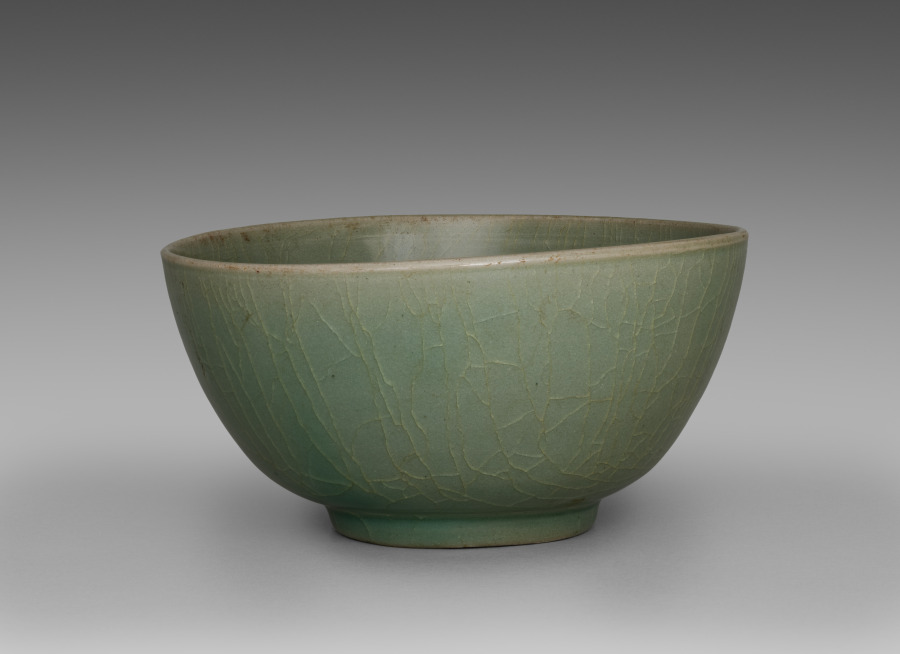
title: Celadon Bowl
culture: Korea, Goryeo dynasty (918–1392)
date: 1200s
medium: Celadon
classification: Ceramic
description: As early as the seventh century, the practice of drinking tea and wine became an important part of elite leisure culture in Korea. A wide bowl like this example was especially suitable for drinking powdered tea shaved from a compressed tea cake, the most commonly enjoyed type during the Goryeo period.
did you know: Crackling occurs when the glaze contracts more rapidly than the clay body during the firing process. In the context of celadon bowls, this phenomenon is not regarded as a flaw but rather as a highly valued aesthetic feature—one that evokes a sense of age.